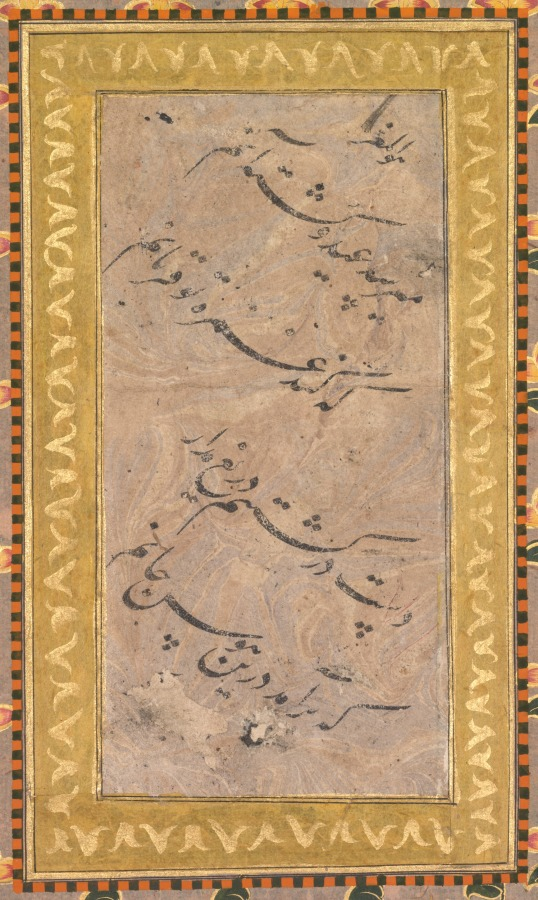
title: Calligraphy (verso)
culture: India, Mughal, 17th century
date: c. 1650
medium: Gum tempera, ink, and gold on paper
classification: Calligraphy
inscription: verso: a Persian quatrain in nast 'aliq calligraphy in black ink on marbled paper. The Feast is approaching, and I am dying for/ Your coquetry to make a sacrifice of me./ Do not hold back from killing me:/ For that very wish I have given up my soul.